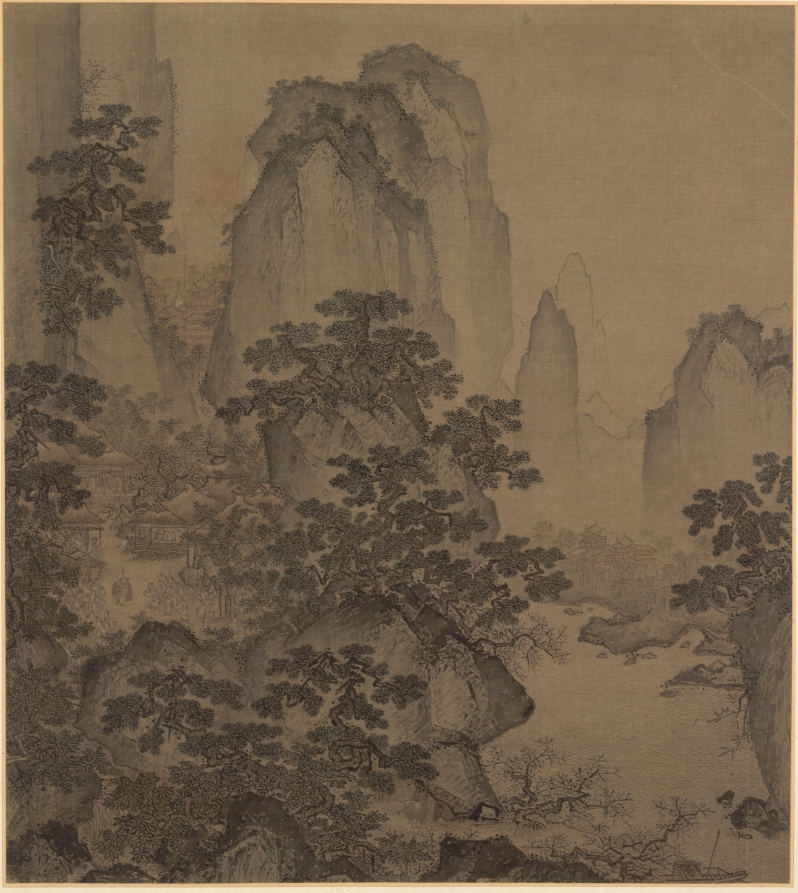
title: The Haven of the Peach-Blossom Spring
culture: China, Ming dynasty (1368–1644)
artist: attributed to Shi Rui (Chinese, c. 1400-c. 1470)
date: mid-1400s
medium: Album leaf; ink and slight color on silk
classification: Painting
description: A miniature inspired by the “Peach Blossom Spring,” this painting illustrates the well-known tale written by the poet-recluse Tao Yuanming (365–427 CE), in which a fisherman accidentally discovers a hidden utopian village where residents live in harmony, untouched by the outside world's troubles. While the painting lacks a signature, scholars concur on its attribution to Shi Rui, evident from the dynamic landscape and the effortlessly rendered figures that showcase the artist's skill.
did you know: Some fifty inhabitants of the Peach Blossom Spring gather in a small clearing surrounded by thatched huts and cottages.